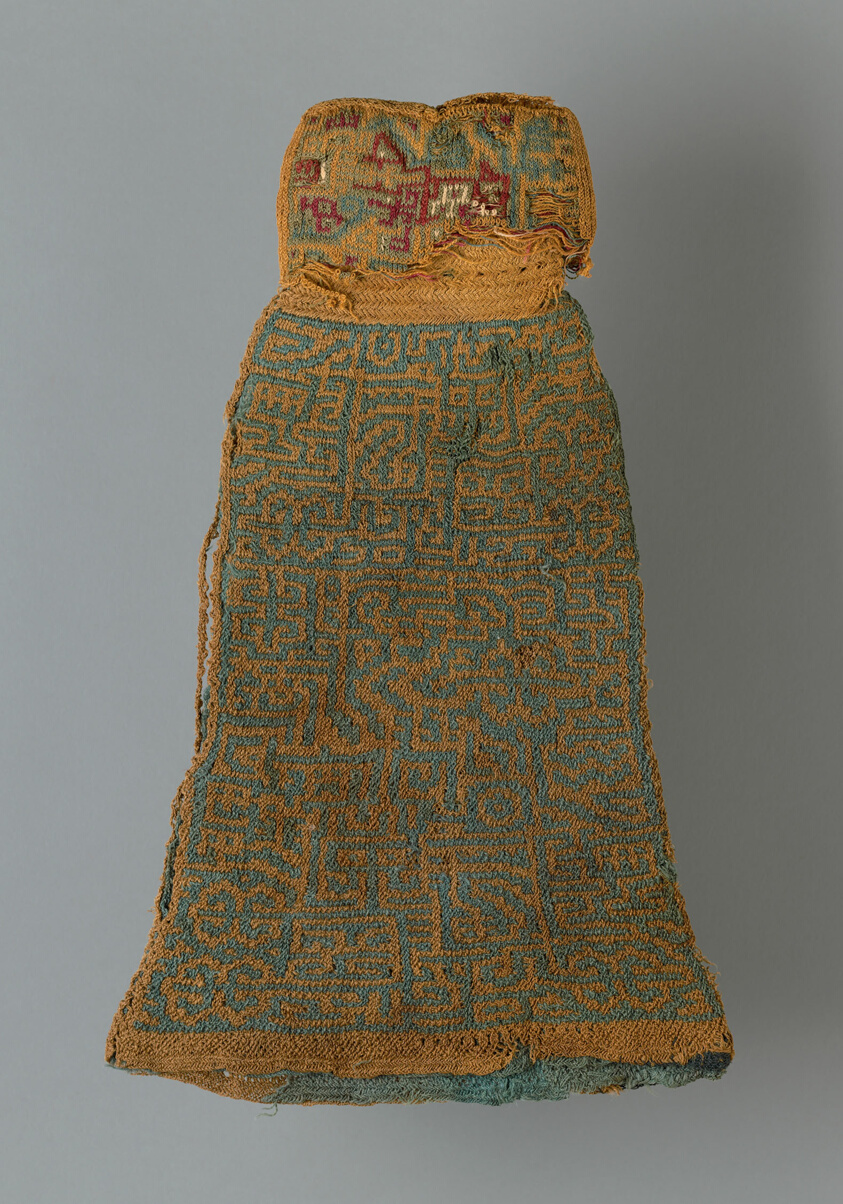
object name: Textile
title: Tassel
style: nazca, early intermediate period, Pre-Columbian, americas, andean, andes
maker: Nazca; Peru, south coast, Probably Nazca Valley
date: A.D. 500/900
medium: Wool (camelid), top: cross-knit looping; band: oblique twill interlacing; bottom: double cloth of double oblique twining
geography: Peru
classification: textile; weaving